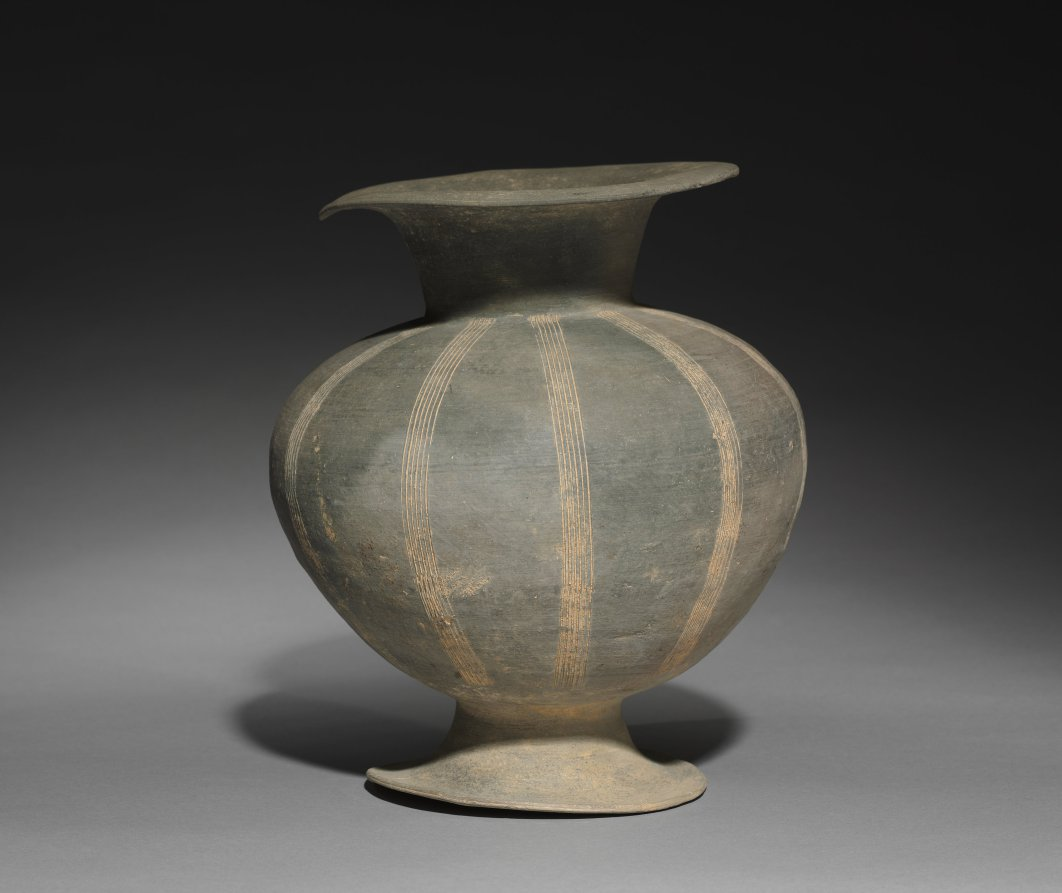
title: Pedestaled Vessel with Incised Band Design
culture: Korea, Proto-Three Kingdoms period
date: 300s CE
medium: earthenware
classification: Ceramic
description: This pedestaled earthenware was a product of closed kilns built on hillsides, which became widely used for producing this type of pottery vessel in Korea during the Three Kingdoms period. Both its gray color and shimmering glaze are the result of the reduction of oxygen in the closed kiln chamber. Due to its relatively tall pedestal, this vessel may have been used for more for ritual settings than everyday use.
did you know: This pedestaled earthenware may have been used for ritual offerings to ancestors.